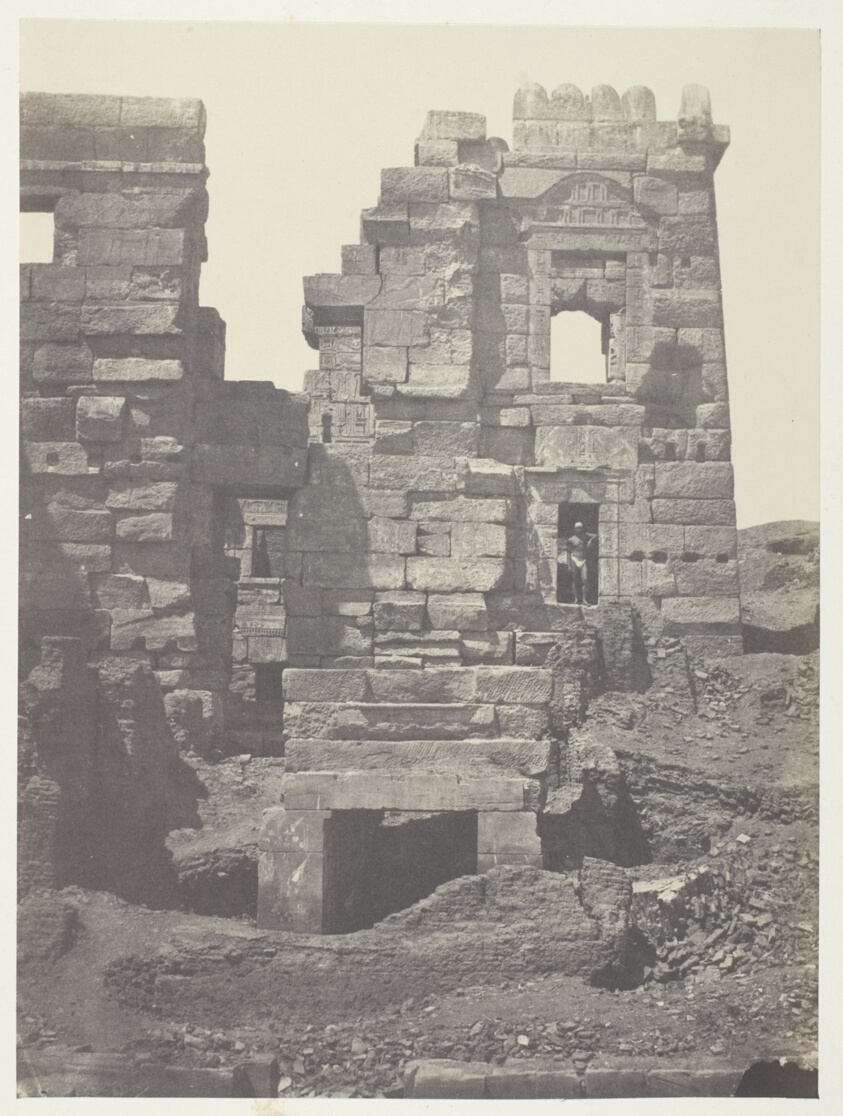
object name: Photograph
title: Médinet-Habou, Façade Septentrionale du Gynécée de Ramsès-Méiamoun; Thèbes, plate 49 from the album "Egypte, Nubie, Palestine et Syrie" (1852)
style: 19th century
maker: Maxime Du Camp (French, 1822–1894)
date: 1849/51, printed 1852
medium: Salted paper print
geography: France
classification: salted paper print; photographic process; photography; photograph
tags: Collected by Hugh Edwards, Egypte, Nubie, Palestine et Syrie